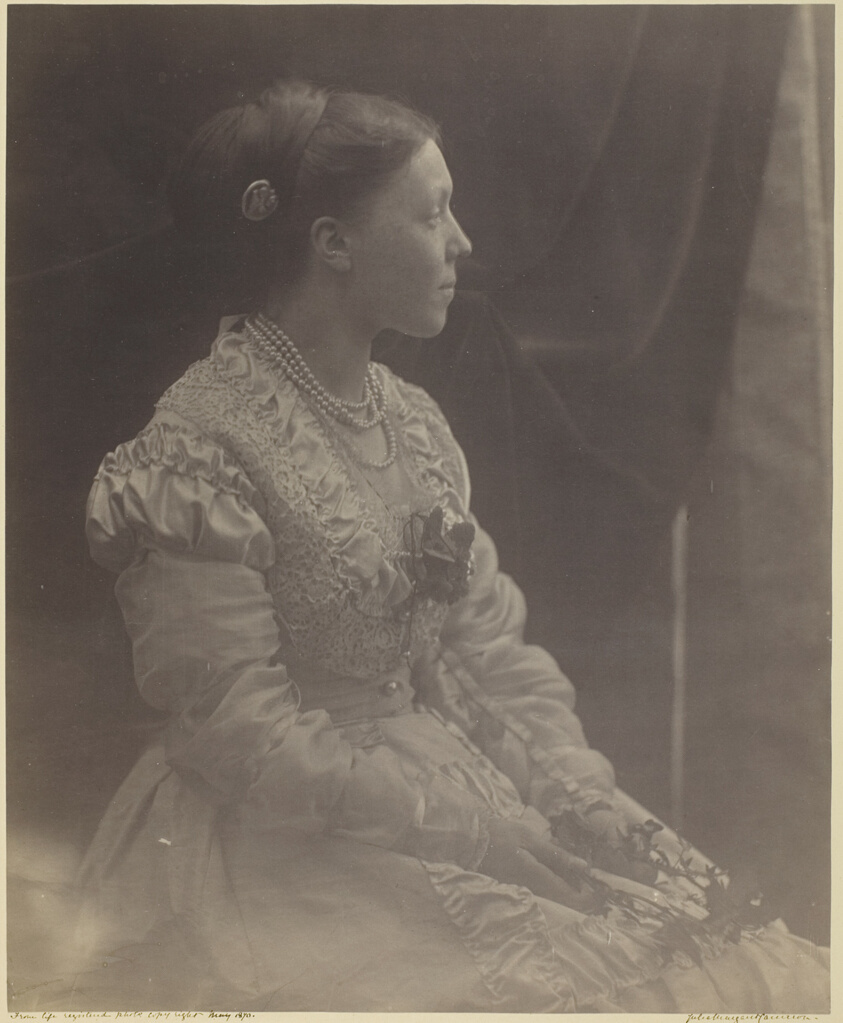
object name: Photograph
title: Anne Thackeray Ritchie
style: 19th century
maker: Julia Margaret Cameron (English, 1815–1879)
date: May 1870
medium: Albumen print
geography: England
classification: albumen silver print; photographic process; photography; photograph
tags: Collected by Hugh Edwards